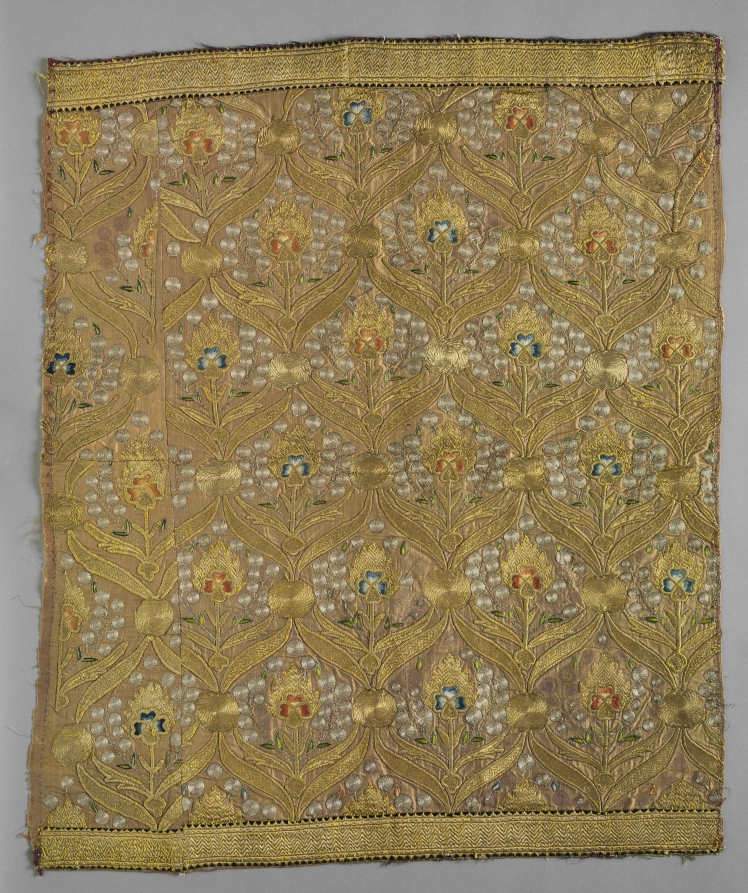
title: Embroidered Square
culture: Turkey, 19th century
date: 19th century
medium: embroidery, silk and metallic threads, on silk tabby ground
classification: Embroidery